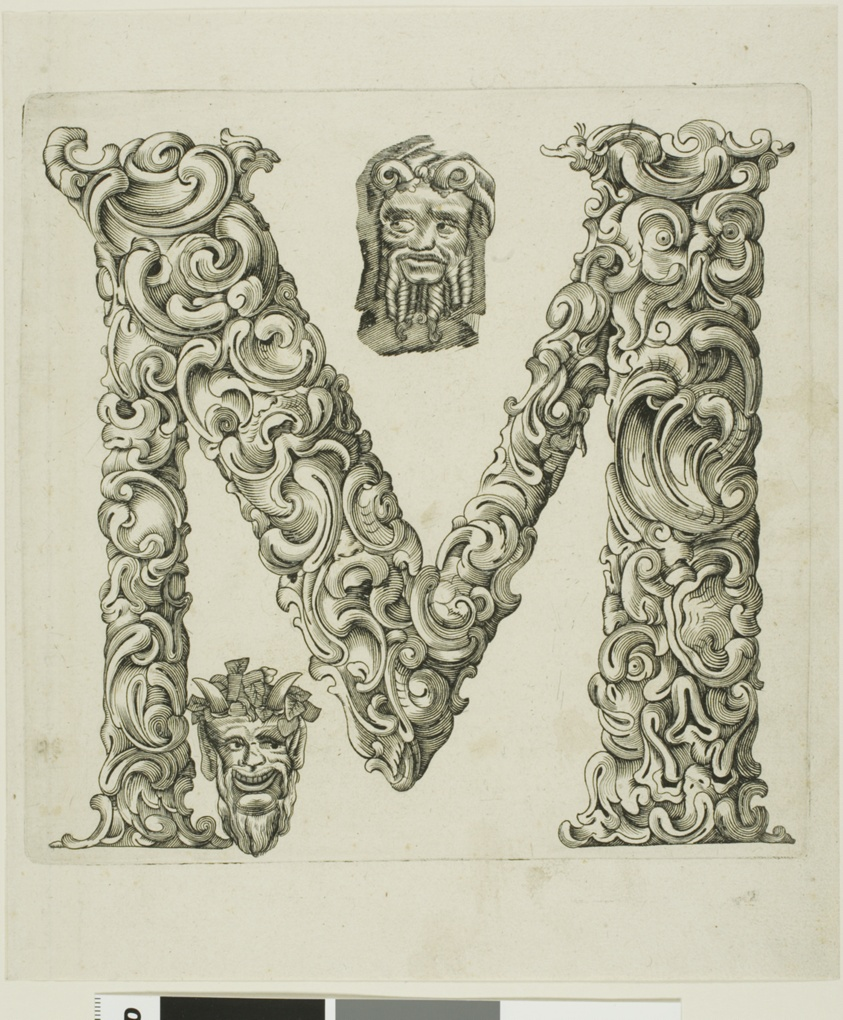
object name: Print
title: Letter M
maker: Peter Aubry (German, 1596-1668)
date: 1630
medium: Engraving on paper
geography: Germany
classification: engraving; print; prints and drawing